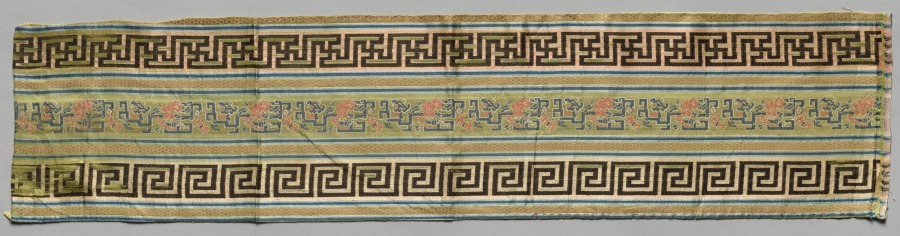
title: Border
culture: China, 19th century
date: 1800s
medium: silk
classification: Textile